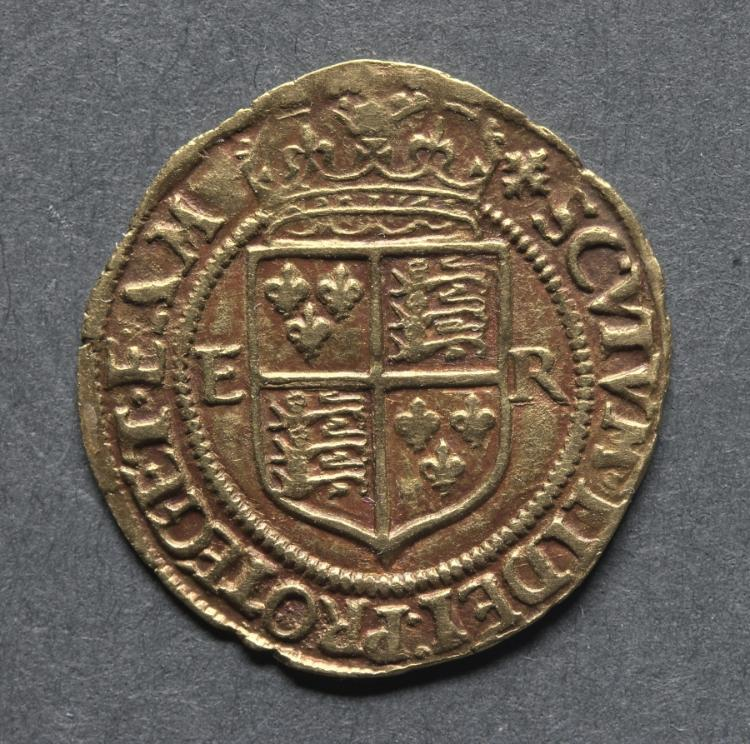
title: Halfcrown: Crowned Shield of Arms (reverse)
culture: England, Elizabeth I, 1558-1603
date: 1560–1561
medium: gold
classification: Coins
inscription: SCVTVM FIDEI PROTEGET EAM